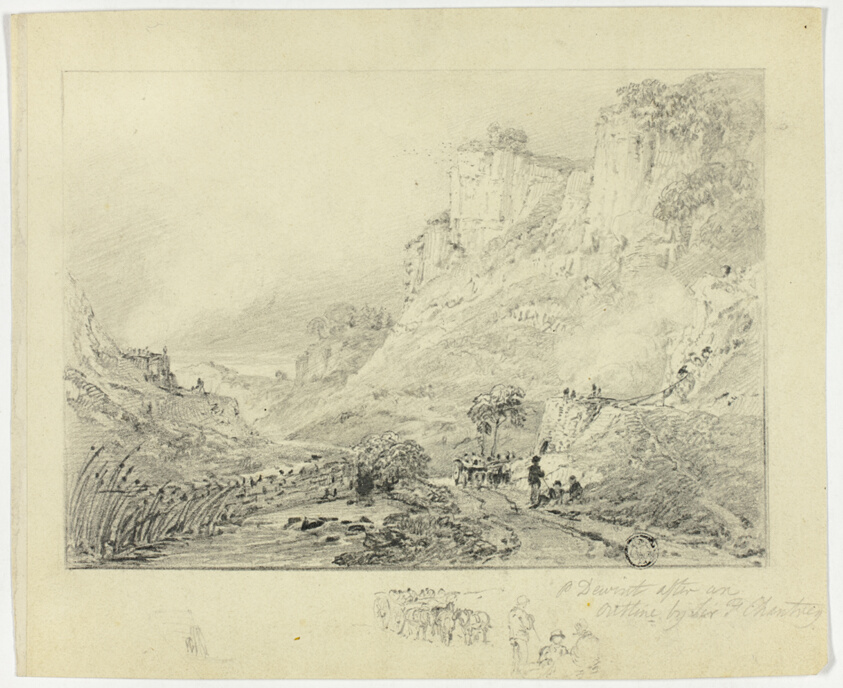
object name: Drawing and Watercolor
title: Figures and Horse Cart in Landscape with Cliffs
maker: Peter De Wint (English, 1784-1849); or after Francis Legatt Chantrey (English, 1781-1841)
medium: Graphite on cream wove paper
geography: England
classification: graphite; paper; drawings (visual works); prints and drawing